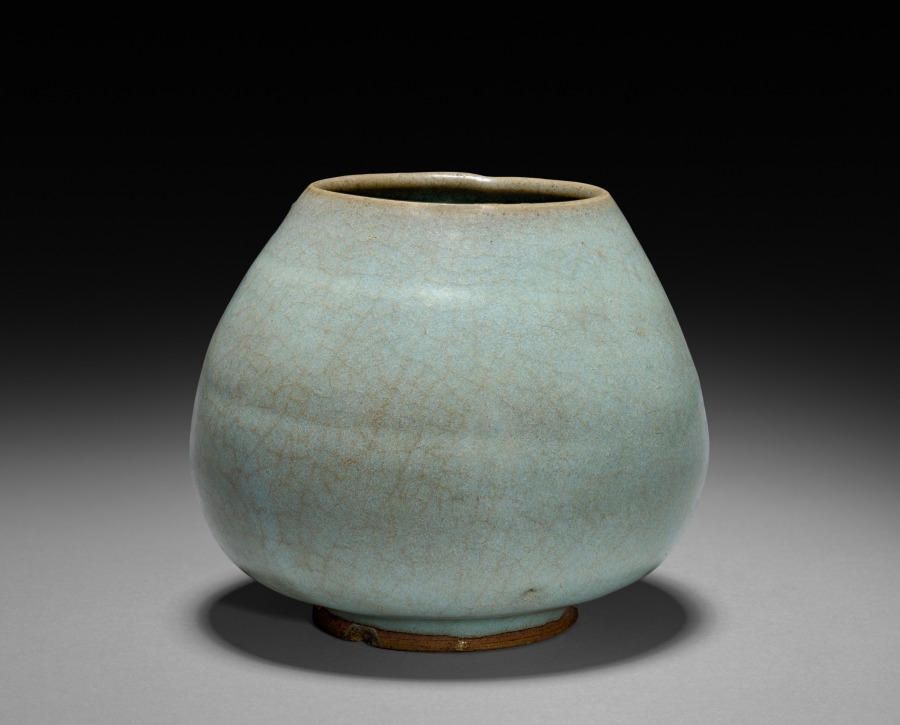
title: Lotus Bud Jar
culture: Northern China, Northern Song dynasty (960-1127) - Jin dynasty (1115-1234)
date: 1100s–1200s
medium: stoneware, Jun ware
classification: Ceramic